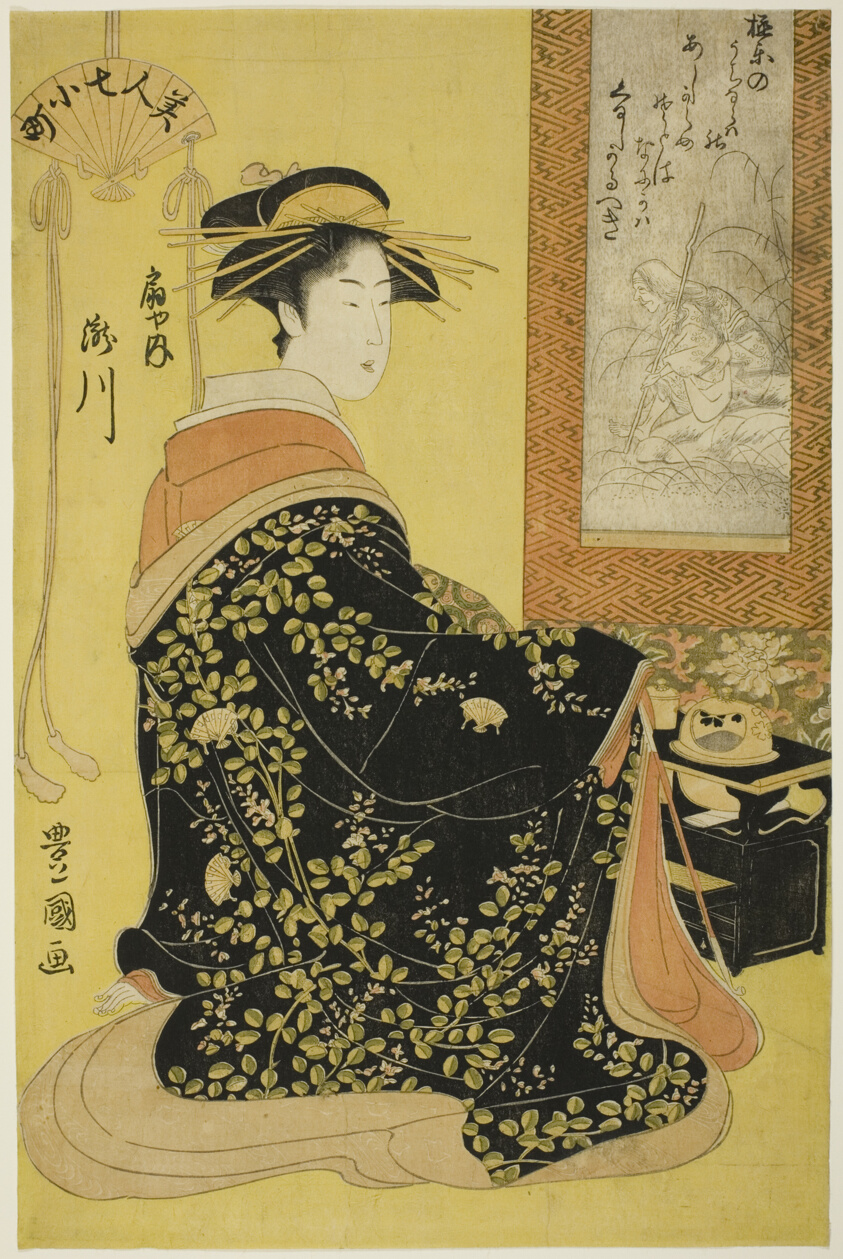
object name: Print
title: The Courtesan Takikawa of Ogiya, from the series Seven Beautiful Komachi (Bijin nana Komachi)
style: Japanese (culture or style)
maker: Utagawa Toyokuni I 初代 歌川 豊国; Japanese, 1769–1825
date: Edo period (1615–1868), about 1794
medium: Color woodblock print; oban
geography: Japan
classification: woodblock print; print; asian art